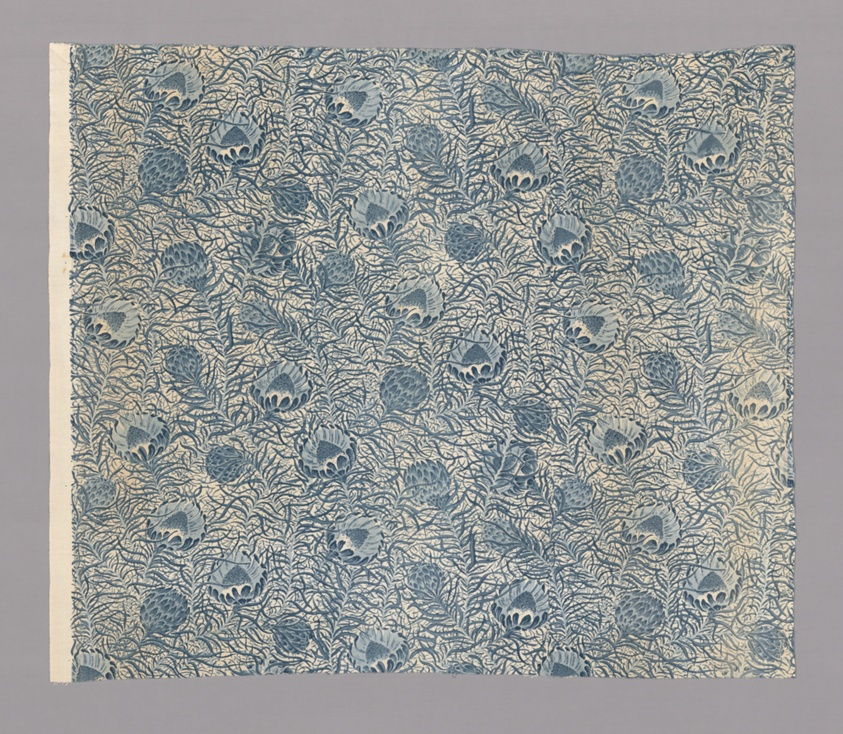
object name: Textile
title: Panel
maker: Probably produced by G.P. & J. Baker Ltd. (founded after 1850); Printed at Swaisland Print Works (Acquired by G. P. & J. Baker after 1893); For Liberty & Co. (founded 1875); England, Crayford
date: c. 1893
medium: Cotton, plain weave; block printed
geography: Crayford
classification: textile; weaving - printed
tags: flowers, foliage